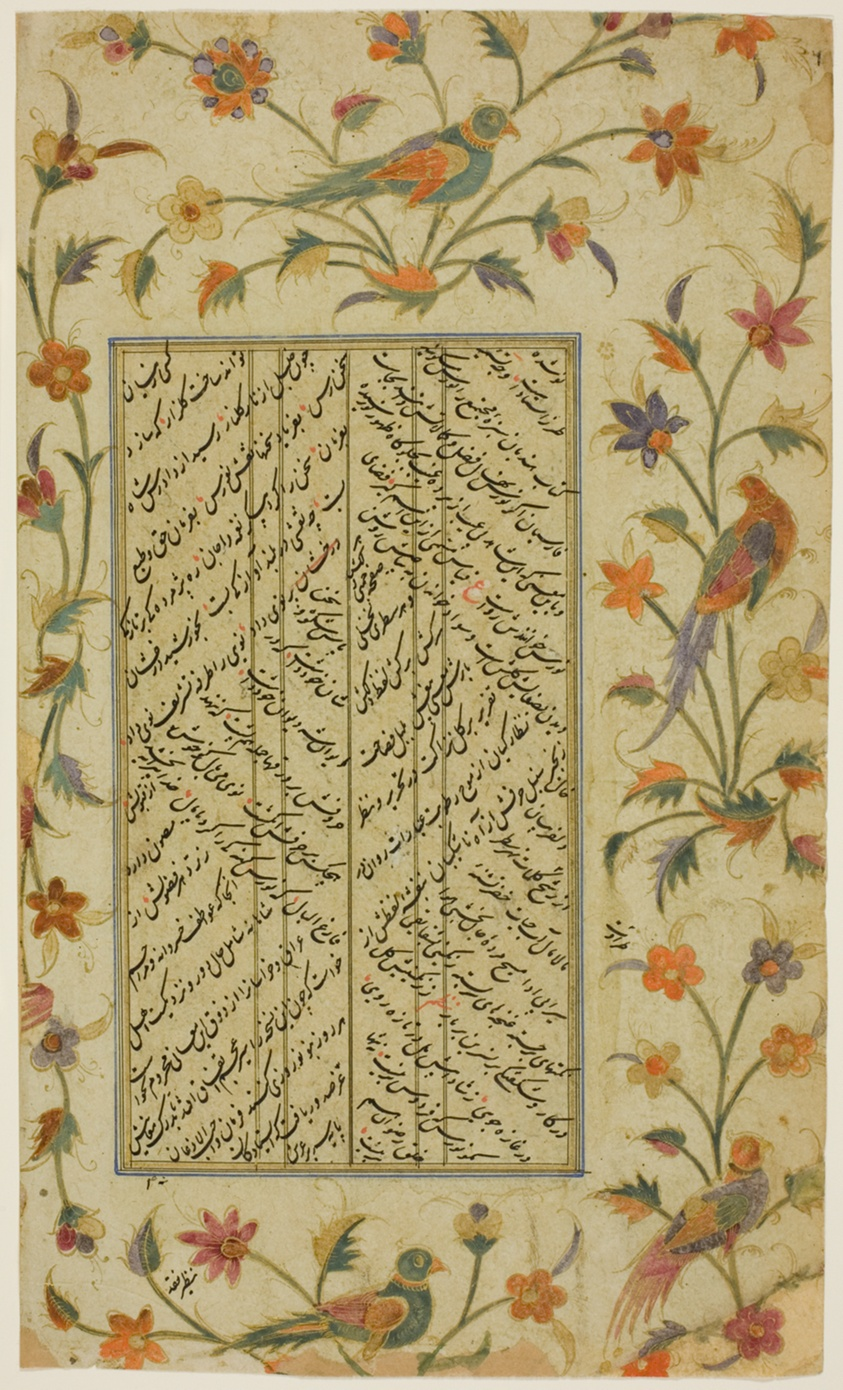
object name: Drawing and Watercolor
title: Page from a manuscript in Nasta'liq with an illuminated border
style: Islamic (culture or style)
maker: Iran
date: Safavid dynasty (1501–1722), 16th century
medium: Ink, opaque watercolor, and gold on paper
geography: Iran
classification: pen and ink drawings; manuscript; asian art